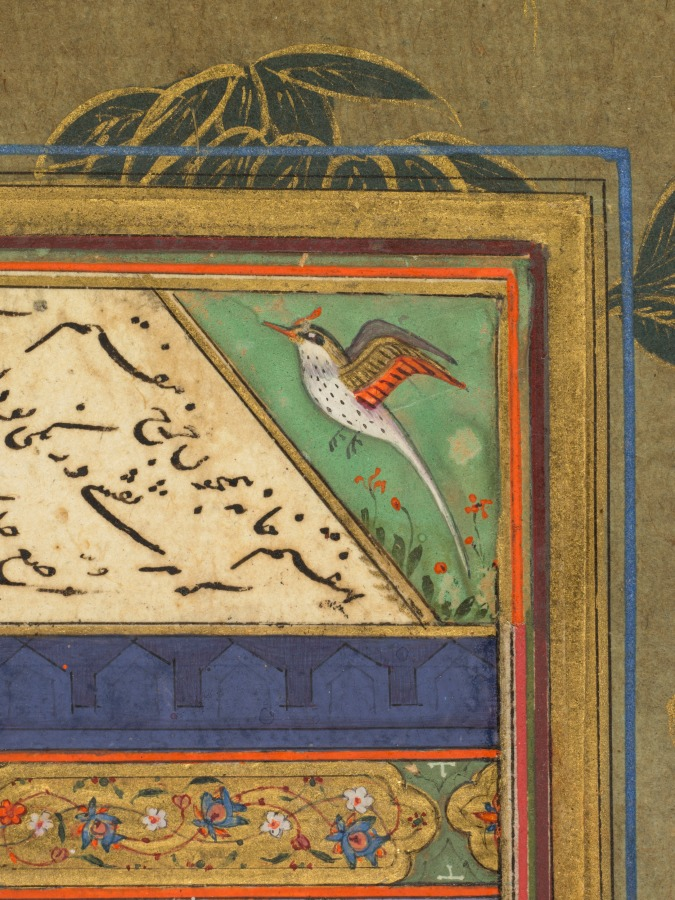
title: Zulaykha in her palace and as an elderly woman with Joseph (recto), from a Panj Ganj (Five Treasures) of Abd al- Rahman Jami (Persian, 1414–1492)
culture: Western Afghanistan, Herat (text); Mughal India (paintings)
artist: Mushfiq (Indian, active early 1600s)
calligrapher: Sultan 'Ali al-Mashadi (Iranian, 1430–1520)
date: 1603–7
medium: Gum tempera, ink, and gold on paper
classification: Painting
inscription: [[Upper left of painting, against a red background, in nasta’liq script]] ' amal - i Mushfiq sana 1015 Text on verso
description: The golden pot of white narcissus flowers at the bottom center of the painting signals that Zulaykha, leaning on her staff to the left, will imminently have her youth and beauty restored. In this Persian retelling of the Old Testament account from the Bible, Zulaykha lusted after Joseph, even though she was already married to Potiphar. Joseph, with the golden halo, resisted her advances until she became a widow and retained his youth, because of his extreme virtue. Above, Zulaykha as a young woman waits for Joseph in her house where murals of them as a happy couple are painted on the walls.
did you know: Zulaykha is shown four times: twice in the murals, seated in the center, and below when she is much older.